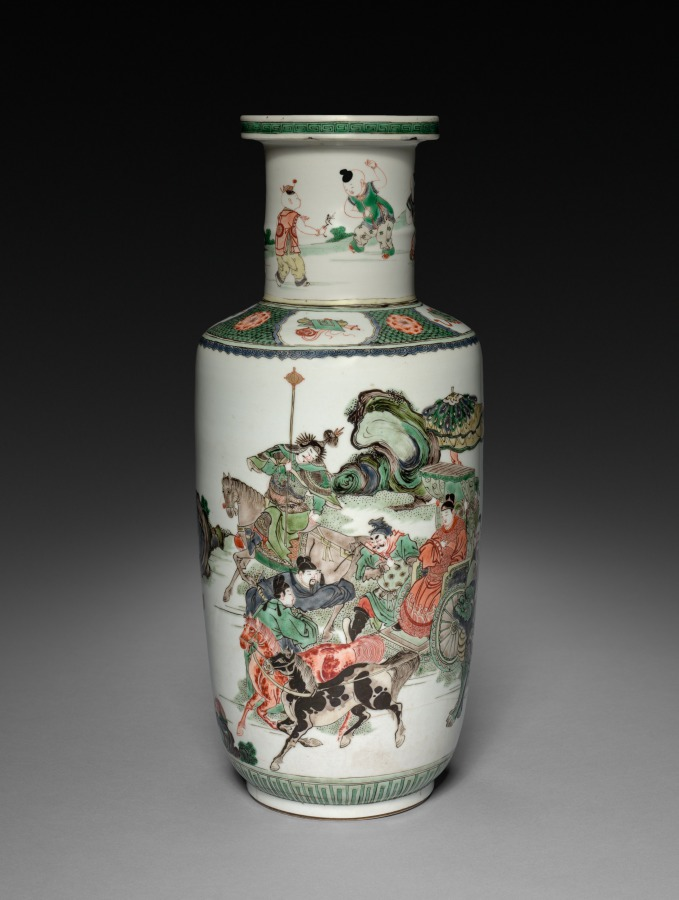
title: Vase with Decoration of Figures in Chariots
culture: China, Qing dynasty (1644-1911), Kangxi reign (1662-1722)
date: 1622–1722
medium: porcelain with famille verte overglaze enamel decoration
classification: Ceramic